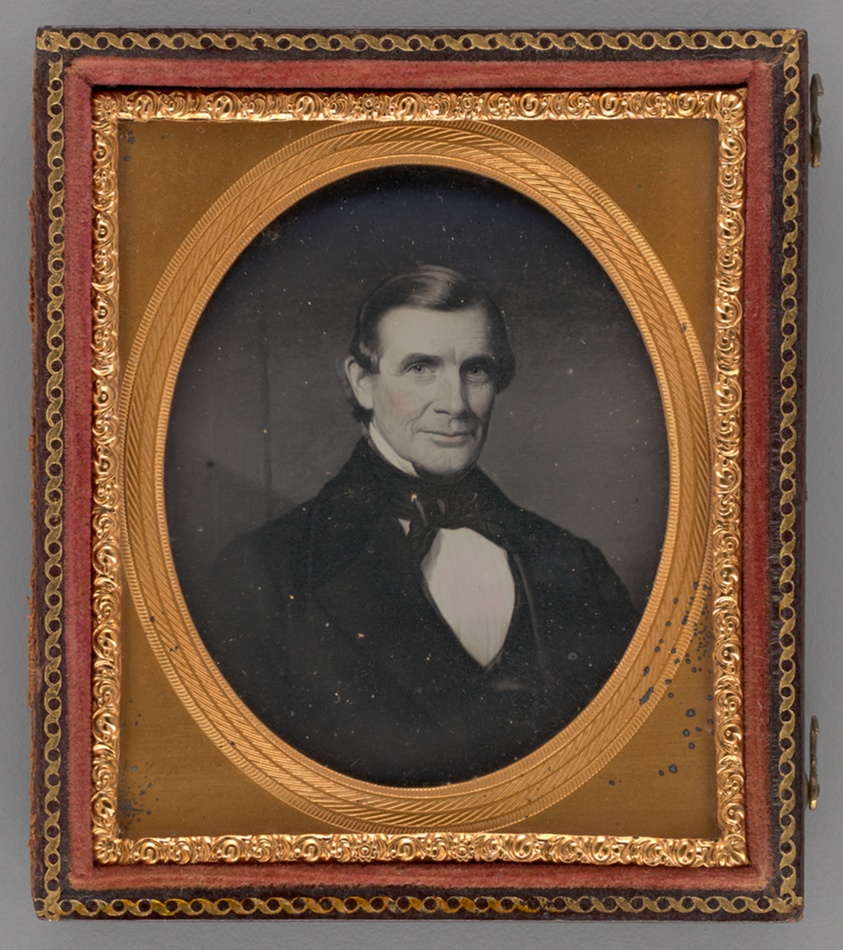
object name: Photograph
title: Untitled (Painted Portrait of Charles Coit)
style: 19th century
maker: S. L. Holman; American, 19th century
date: 1855/56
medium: Daguerreotype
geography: United States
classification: portrait; photograph; photographic process; photography; portrait; daguerreotype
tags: lundberg collection, portraits, Male, portrait, portraits: male subject